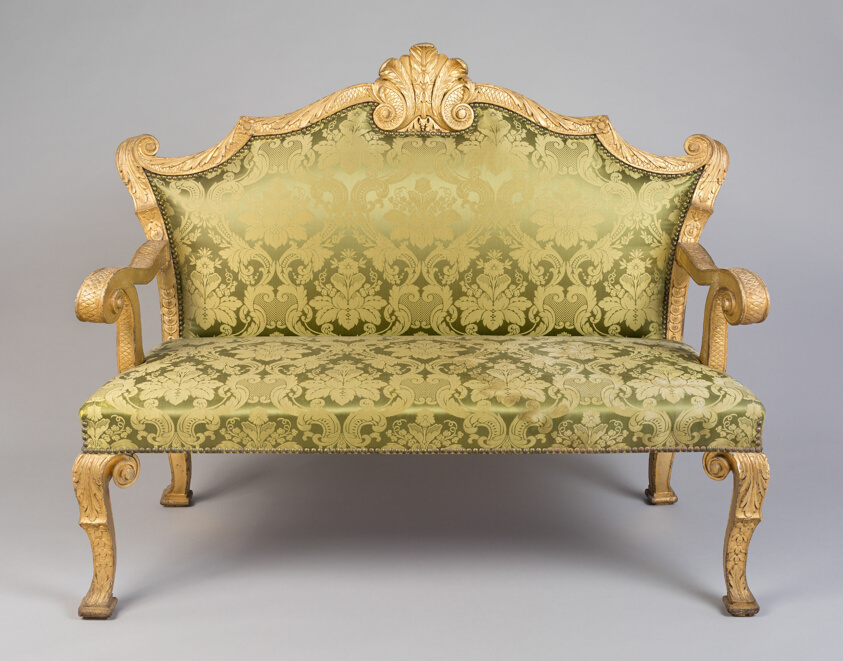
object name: Furniture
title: Settee (one of a pair)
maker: England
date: 1725/35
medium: Carved and gilded beechwood, modern upholstery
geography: England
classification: seating; european decorative arts; furniture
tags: furniture